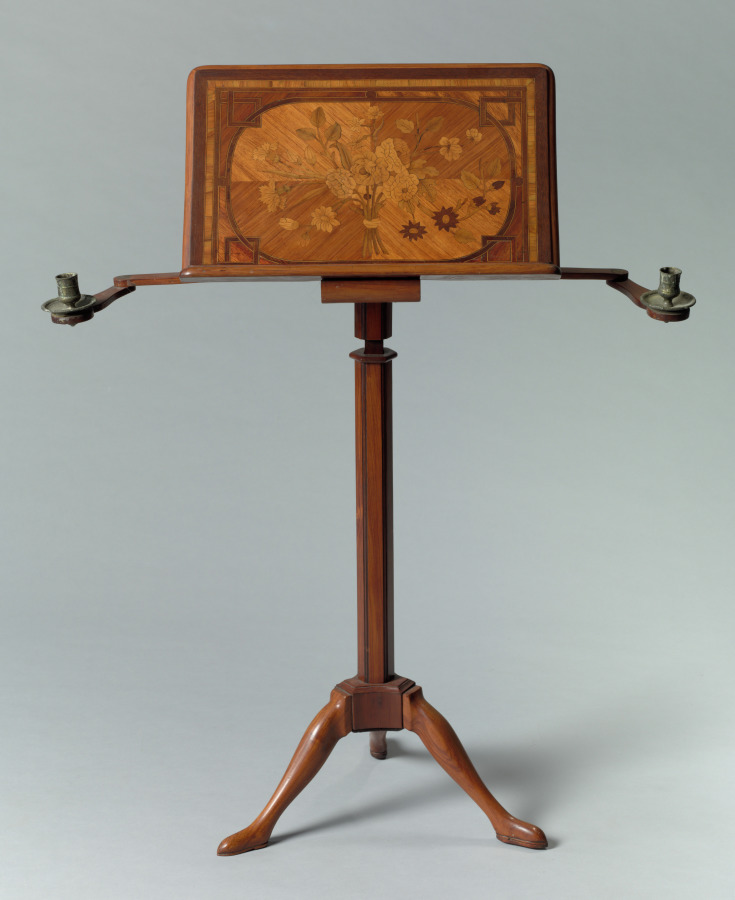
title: Music Stand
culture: France, style of Louis XVI, 18th Century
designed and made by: Canabas (French, 1715–1797)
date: c. 1775–1790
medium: satinwood veneer, with marquetry panel of various woods and metal candle holders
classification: Furniture and woodwork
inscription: signed: Canabas